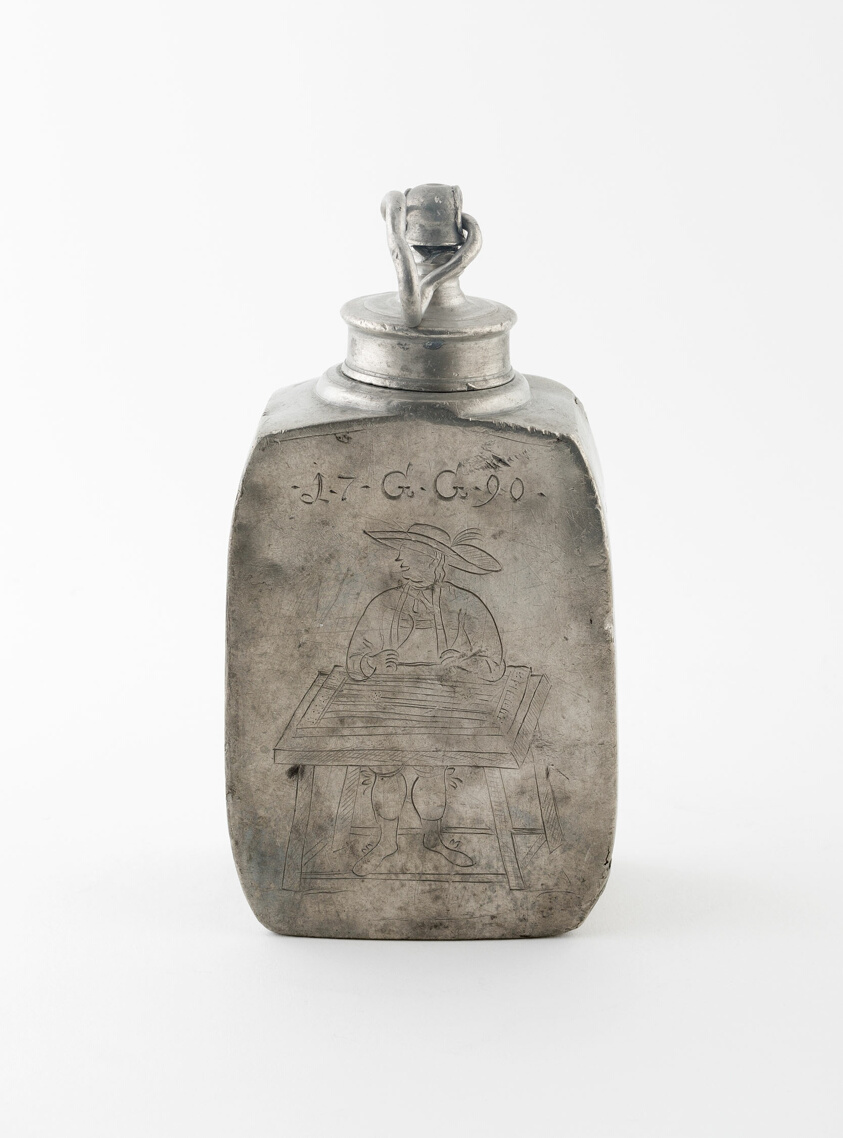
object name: Metalwork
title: Wine Can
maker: Germany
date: c. 1790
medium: Pewter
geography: Germany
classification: pewter; metalwork; european decorative arts